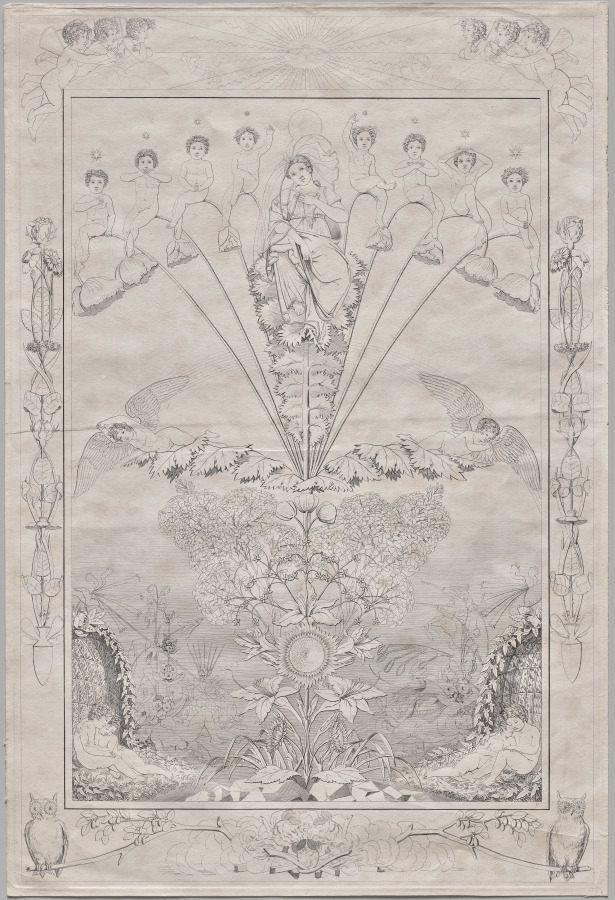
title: Night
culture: Germany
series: Times of Day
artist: Philipp Otto Runge (German, 1777–1810)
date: 1803–5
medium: etching on heavy wove paper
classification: Print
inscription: Written in pencil on mat: "Nacht"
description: Phillip Otto Runge’s large-scale, four-part print series, Tageszeiten (Times of Day), is a landmark of German Romantic printmaking, capturing the “new art” promoted by Runge and his contemporary, Caspar David Friedrich, one rooted in a more personal and spiritual response to nature. Runge presents allegories of nature as a means to understand God and the sublime on earth. His four-part series represents not only the four times of day but also the seasons and the stages of human life, while contrasting eternal time with human time through various literary and religious references. Viewing the series from Morning to Night, seedlings emerge from the earth, bloom, decay, and die. Young spirits or children are born, mature, and grow old, eventually entering a sleep reminiscent of death. A female figure appearing in two scenes, possibly Mother Nature, inspires abundance and then embraces its decline, suggesting nature’s continuity despite human mortality. In each plate, Runge contrasts eternal time with human time, or spirituality with physicality, by contrasting the iconography in the borders with that in the centers.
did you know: After receiving a set of Times of Day as a gift from the artist, the German author Johann Wolfgang von Goethe (1749–1832) apparently exclaimed, “it’s enough to drive you crazy—beautiful, and mad at the same time!”